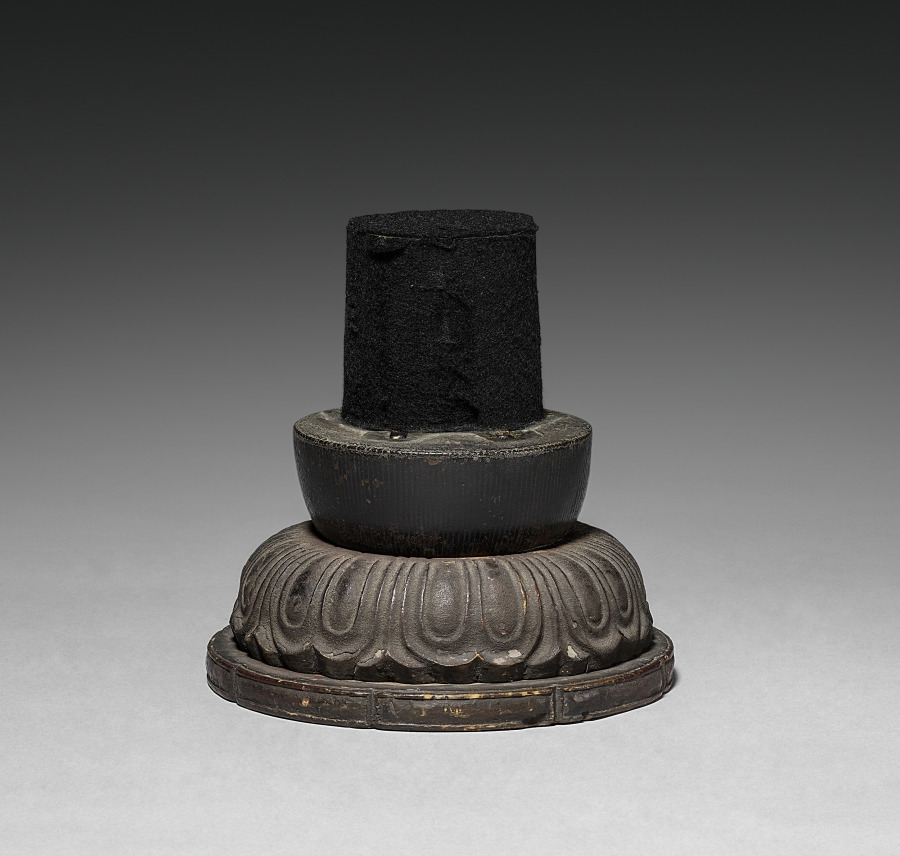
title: Amida (base)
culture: Japan, Kamakura period (1185–1333) to Nanbokuchō period (1336–92)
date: 1300s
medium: wood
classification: Sculpture